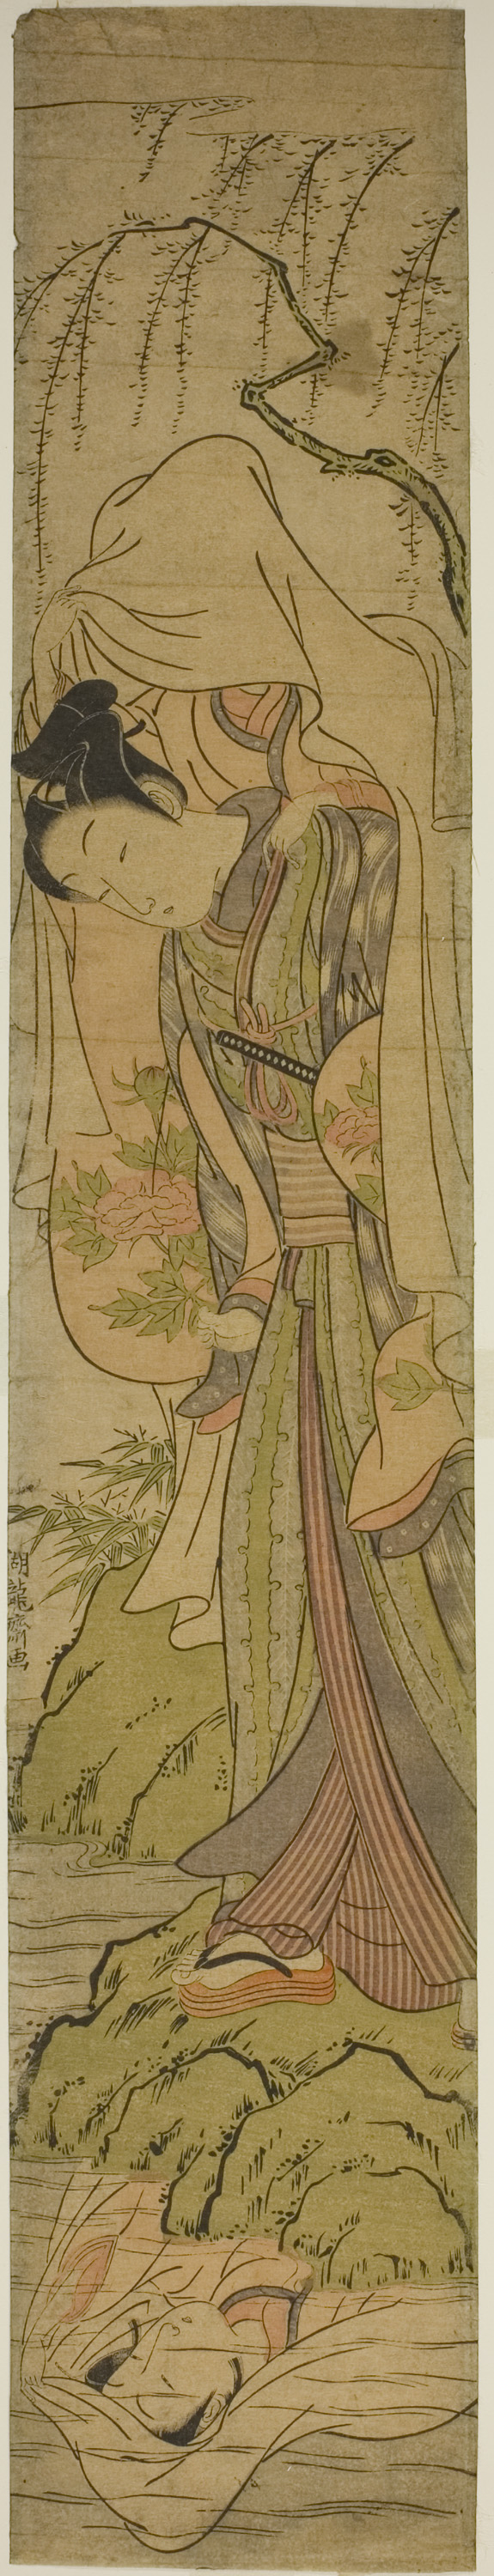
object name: Print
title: Young Man Carrying a Girl Sees her Reflection in the Water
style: Japanese (culture or style)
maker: Isoda Koryusai (Japanese, 1735-1790)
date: c. 1771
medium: Color woodblock print; hashira-e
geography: Japan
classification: woodblock print; print; asian art